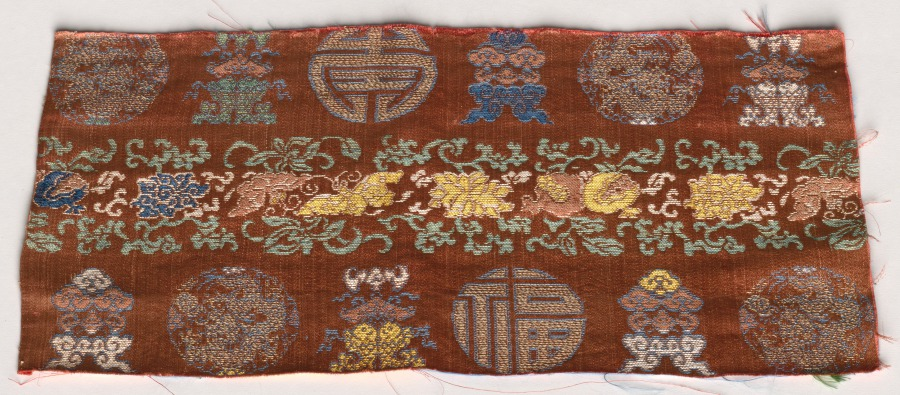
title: Fragment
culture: China, 19th century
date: 1800s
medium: silk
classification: Textile